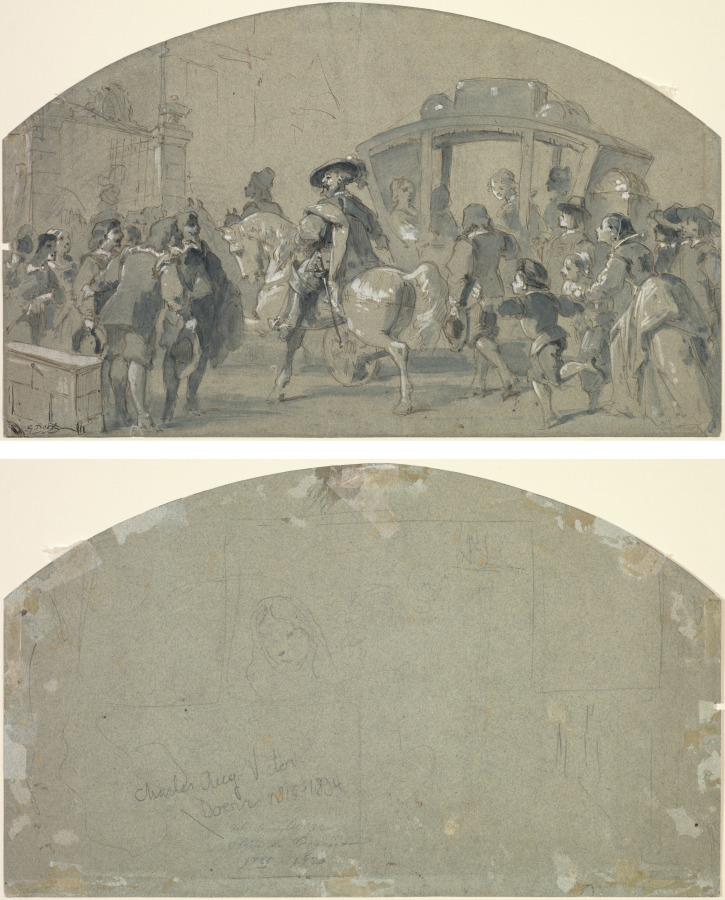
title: Street Scene (recto); Sketches (verso)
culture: France, 19th century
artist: Gustave Doré (French, 1832–1883)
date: c. 1848–49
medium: pen and brown ink and gray wash with white (recto); graphite (verso)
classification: Drawing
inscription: Signed in black ink, lower left: G. Dore; verso, slight graphic sketch of a woman's head; verso, inscribed in graphite, lower center: Charles Aug. Victor/Doerr 1815-1894/In another hand, in graphite: Ch. V. Doerr/eleve de Cogniet/1821-1880